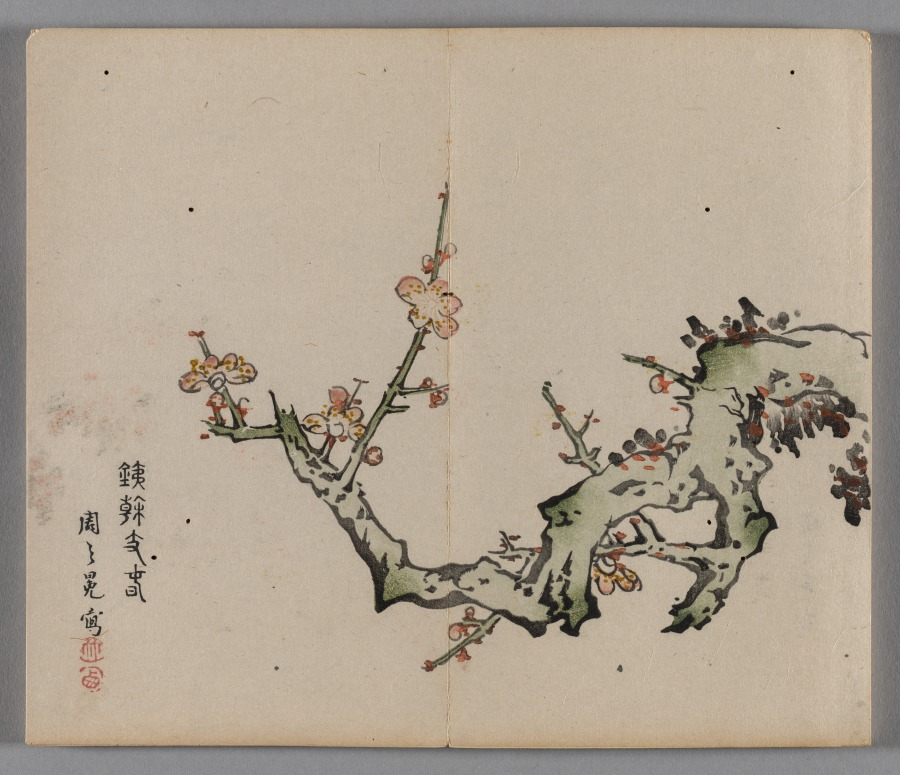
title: Ten Bamboo Studio Painting and Calligraphy Handbook (Shizhuzhai shuhua pu): Plum Blossoms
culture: China, Qing dynasty (1644-1911)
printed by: Hu Zhengyan (Chinese, c. 1584–1674)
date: 1633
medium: Woodblock-printed book; ink and colors on paper; first edition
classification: Print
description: Color printing reached a level of perfection in the early 1600s, as seen in this Ten Bamboo Studio Collection of Calligraphy and Painting and the Mustard Seed Garden Manual of Painting (printed 1679 and 1701). The painterly quality, precision in registering (aligning) the woodblocks, and harmonious colors made them the most successful color print editions in Chinese history. Both editions were printed and compiled in Nanjing, spread nationwide, and had a great impact on the arts in Japan and Korea.